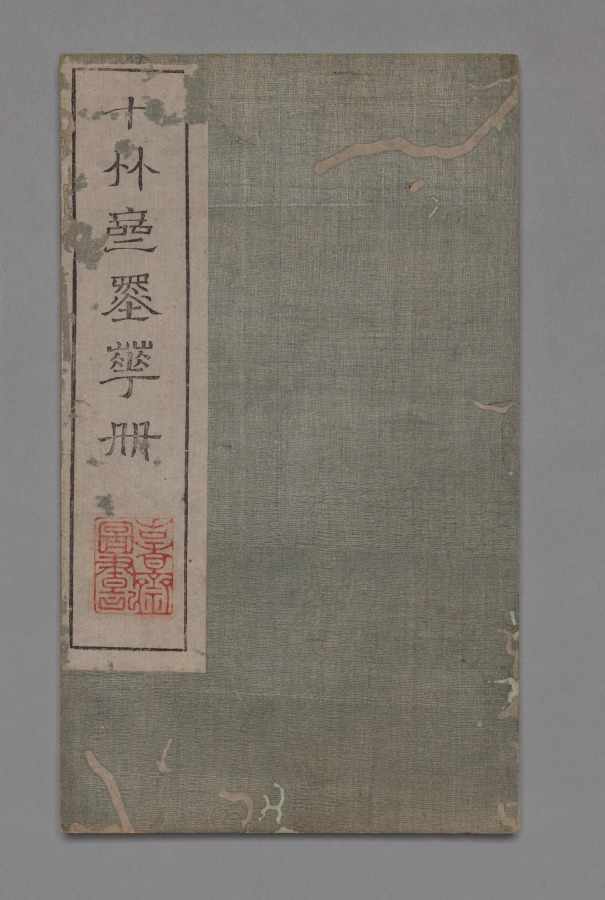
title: Ten Bamboo Studio Painting and Calligraphy Handbook (Shizhuzhai shuhua pu): Round Fans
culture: China, Qing dynasty (1644-1911)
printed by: Hu Zhengyan (Chinese, c. 1584–1674)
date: 1633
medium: Woodblock-printed book; ink and colors on paper; first edition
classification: Print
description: Color printing reached a level of perfection in the early 1600s, as seen in this Ten Bamboo Studio Collection of Calligraphy and Painting and the Mustard Seed Garden Manual of Painting (printed 1679 and 1701). The painterly quality, precision in registering (aligning) the woodblocks, and harmonious colors made them the most successful color print editions in Chinese history. Both editions were printed and compiled in Nanjing, spread nationwide, and had a great impact on the arts in Japan and Korea.